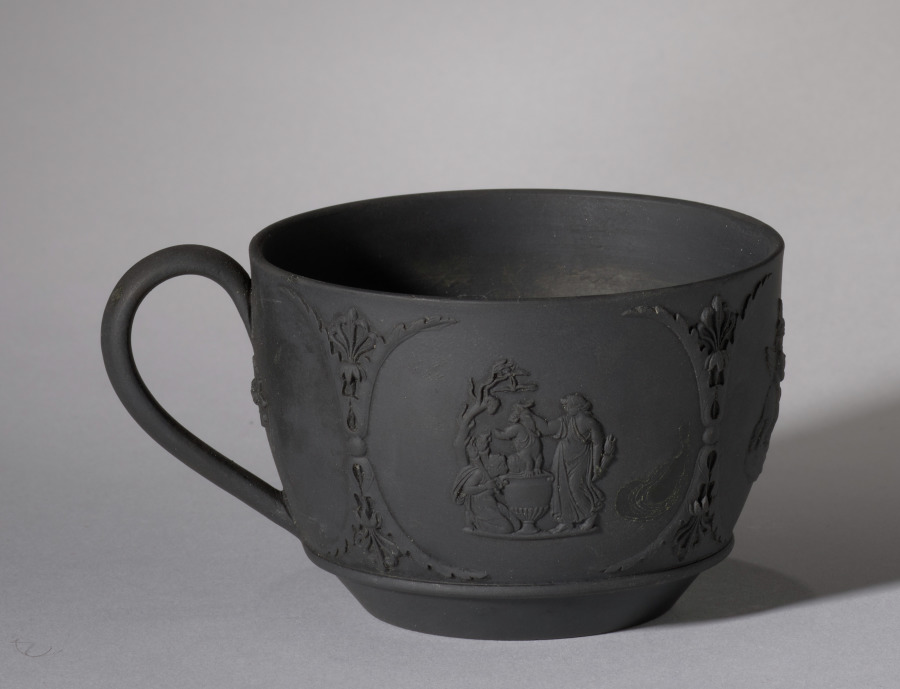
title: Cup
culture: England, Staffordshire, 19th century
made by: Wedgwood Factory (British)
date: 1800s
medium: black basalt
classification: Ceramic